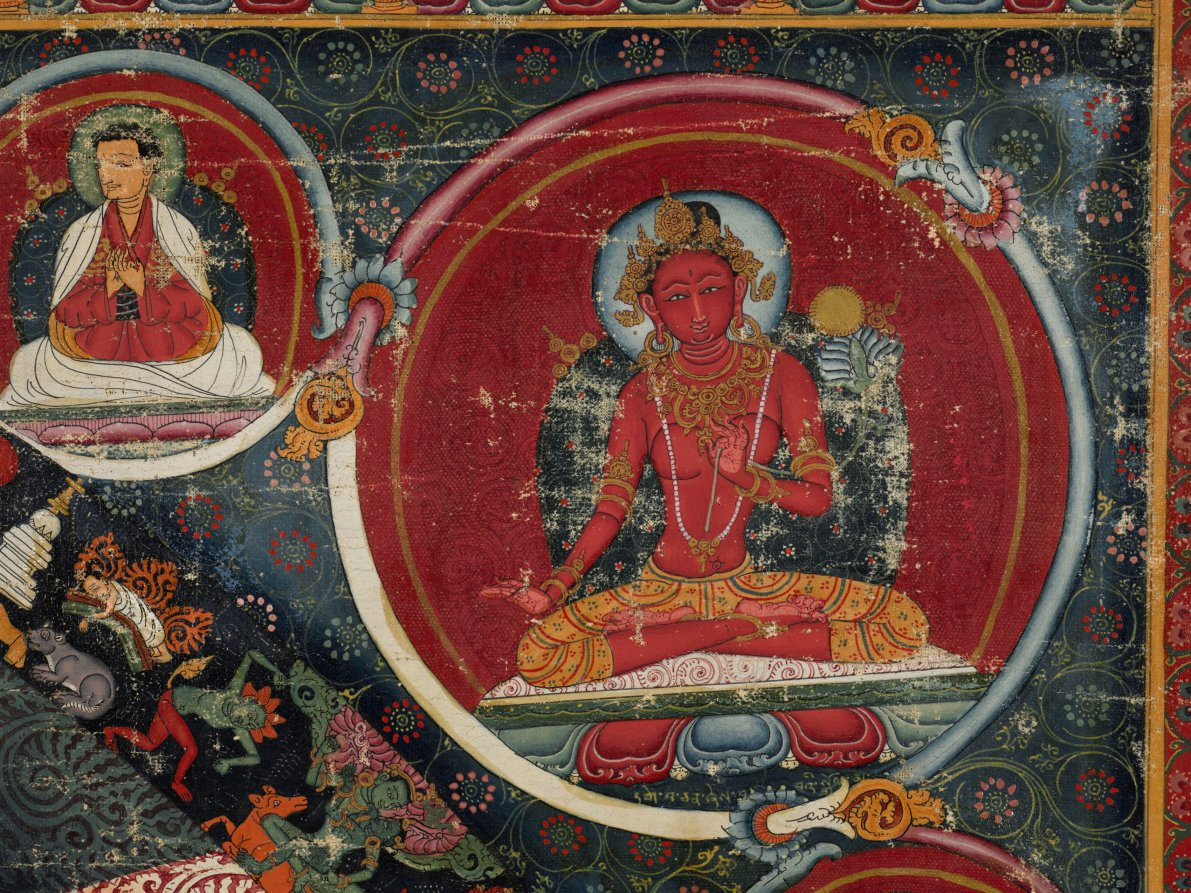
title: Twenty-three Deity Nairatma Mandala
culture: Central Tibet, Sakya-affiliated monastery, 14th century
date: c. 1375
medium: Gum tempera, ink, and gold on cloth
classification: Painting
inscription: The inscription along the bottom says: Twenty-three deity Nairatma Mandala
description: One of the main types of imagery in tantric Buddhist art is the mandala, a two-dimensional diagram of the realm of an enlightened being. This mandala depicts the palace of Nairatma, who dances in the center surrounded by her entourage. Using the painting as a guide, the tantric practitioner in meditation mentally projects the two-dimensional plan into three-dimensional space and enters into it. The outermost ring contains depictions of the cremation grounds, where corpses are being burned and consumed, as well as tantric yogis and masters who work there in order to understand the impermanence of the body, defeat their fear of death, and overcome irrational aversions to impure aspects of life. Virupa is depicted twice, always pointing to arrest the sun with his raised left hand. He sits among the row of lineage masters along the top edge, and is also depicted in the topmost segment of the ring of cremation grounds, being served a cup of liquor. Along with lineage masters at the top of this impressive painting, bodhisattvas and important masters are depicted in the spandrels, each identified by an inscription.